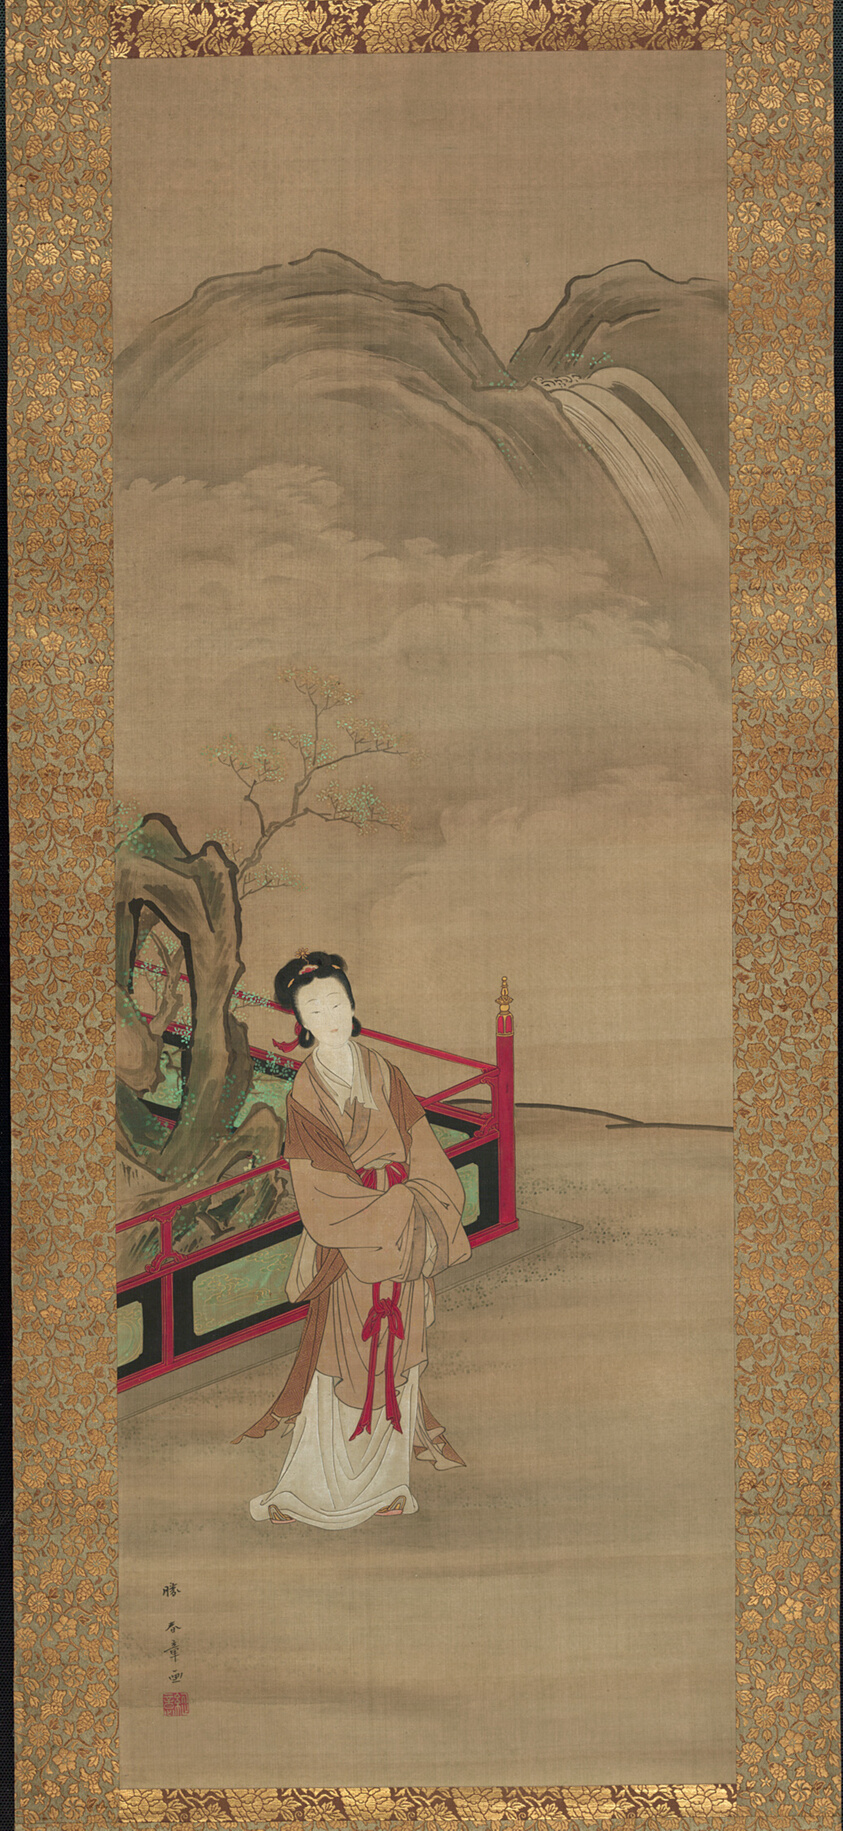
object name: Painting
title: Yang Guifei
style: Japanese (culture or style)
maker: Katsukawa Shunshō 勝川 春章; Japanese, 1726-1792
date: 1789-92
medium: Hanging scroll; ink and colors on silk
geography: Japan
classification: hanging scroll; painting; asian art